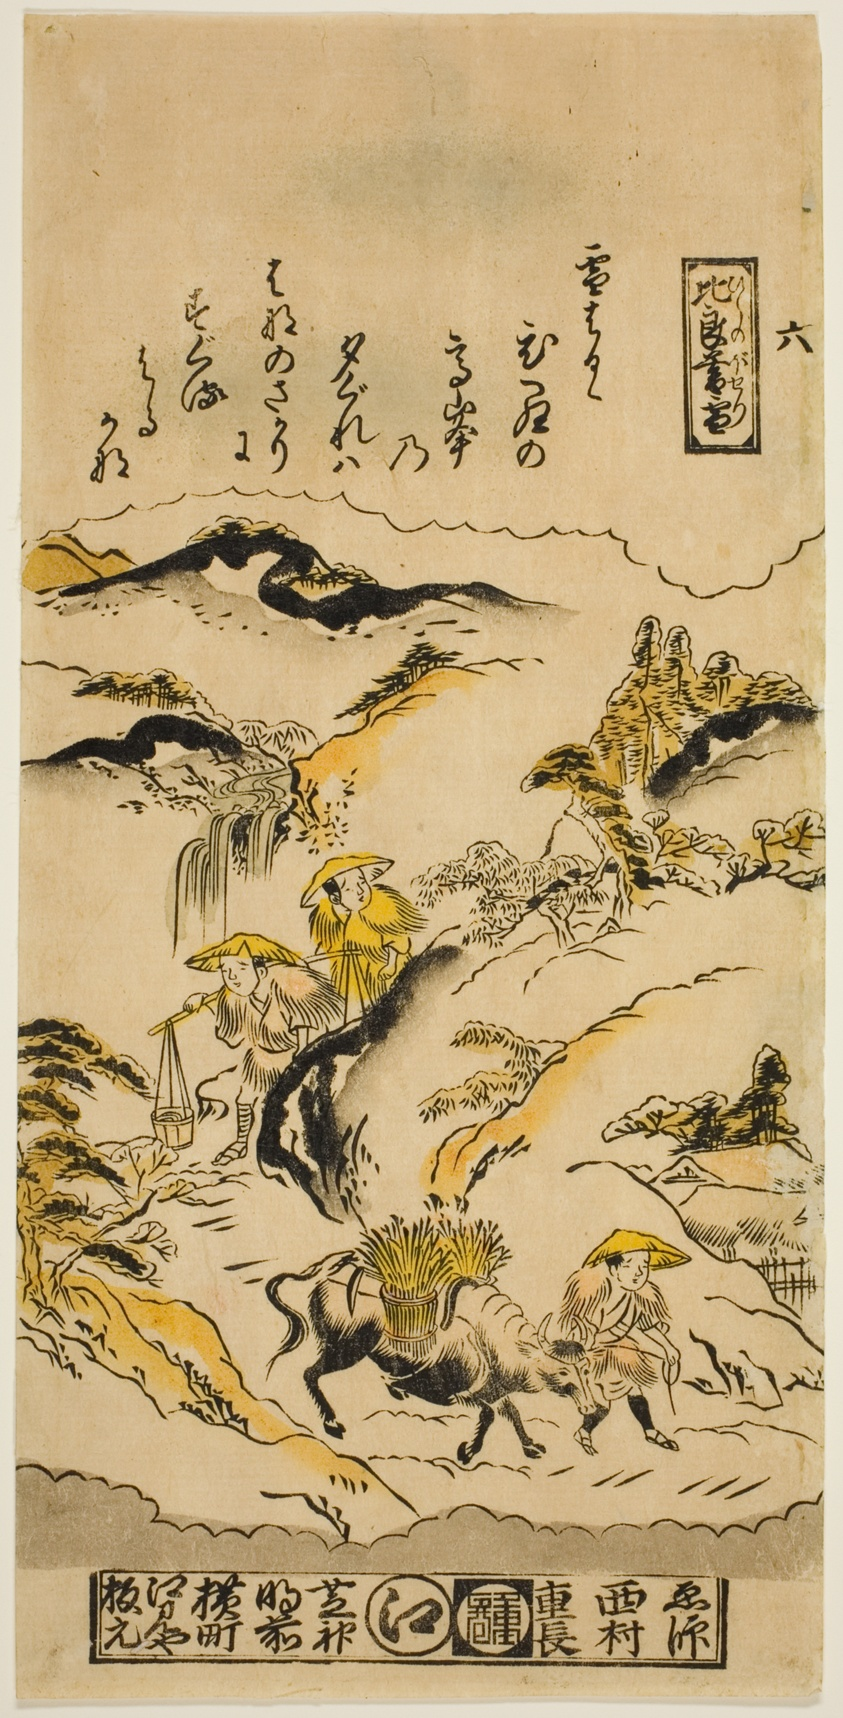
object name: Print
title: Evening Snow on Mt. Hira (Hira no bosetsu), No. 6 from the series "Eight Views of Omi"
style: Japanese (culture or style)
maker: Nishimura Shigenaga (Japanese, 1697 (?)-1756)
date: c. 1716/36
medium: Hand-colored woodblock print; hosoban, urushi-e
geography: Japan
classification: woodblock print; print; asian art